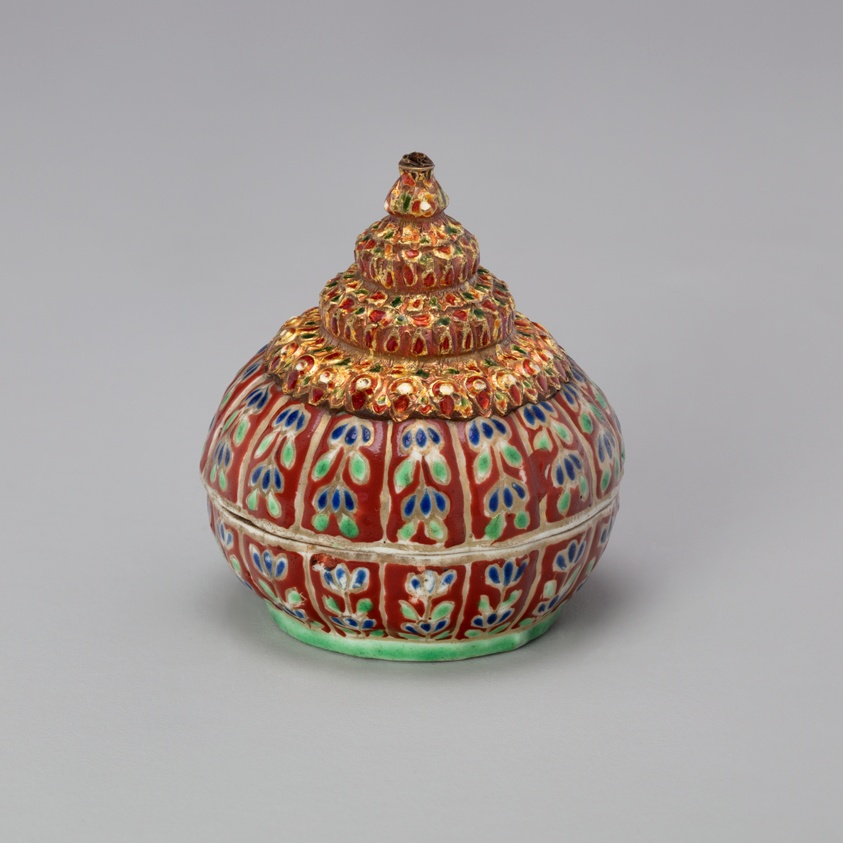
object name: Vessel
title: Lai Nam Thong (Gold-Washed) Ware, Miniature Jar with Tiered Cover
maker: China, for the Thai Market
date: 19th century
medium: Porcelain painted with gilt in overglaze polychrome enamels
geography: China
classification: porcelain; asian art; ceramics; vessel